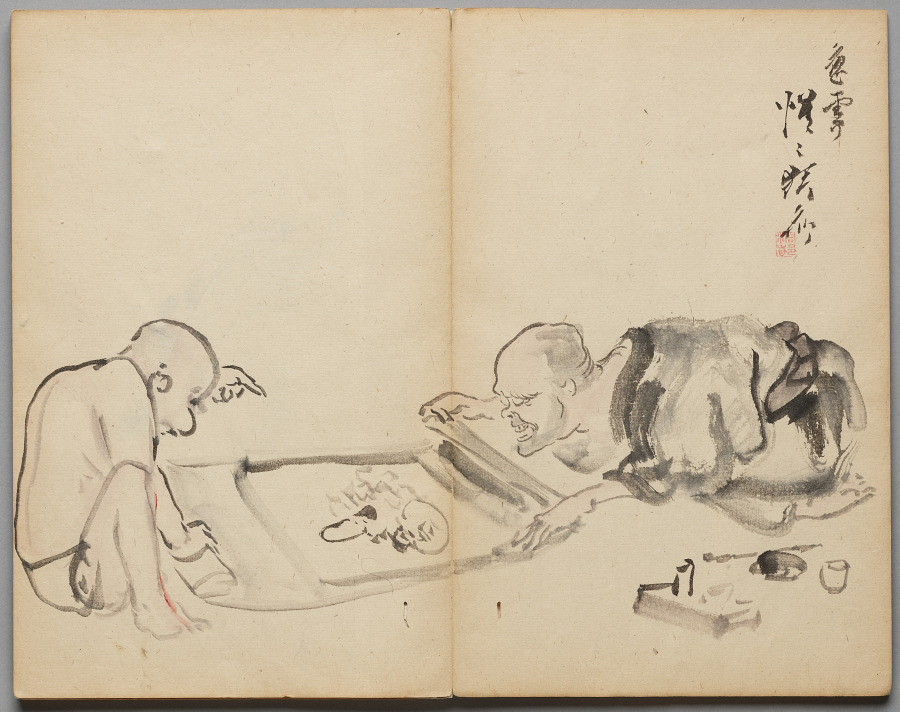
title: Looking at a Painting from Sketch Album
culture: Japan, Edo period (1615–1868) to Meiji period (1868–1912)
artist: Kawanabe Kyōsai (Japanese, 1831–1889)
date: mid- to late 1800s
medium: Accordion-style book of 26 double-leaves; ink and color on paper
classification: Bound Volume